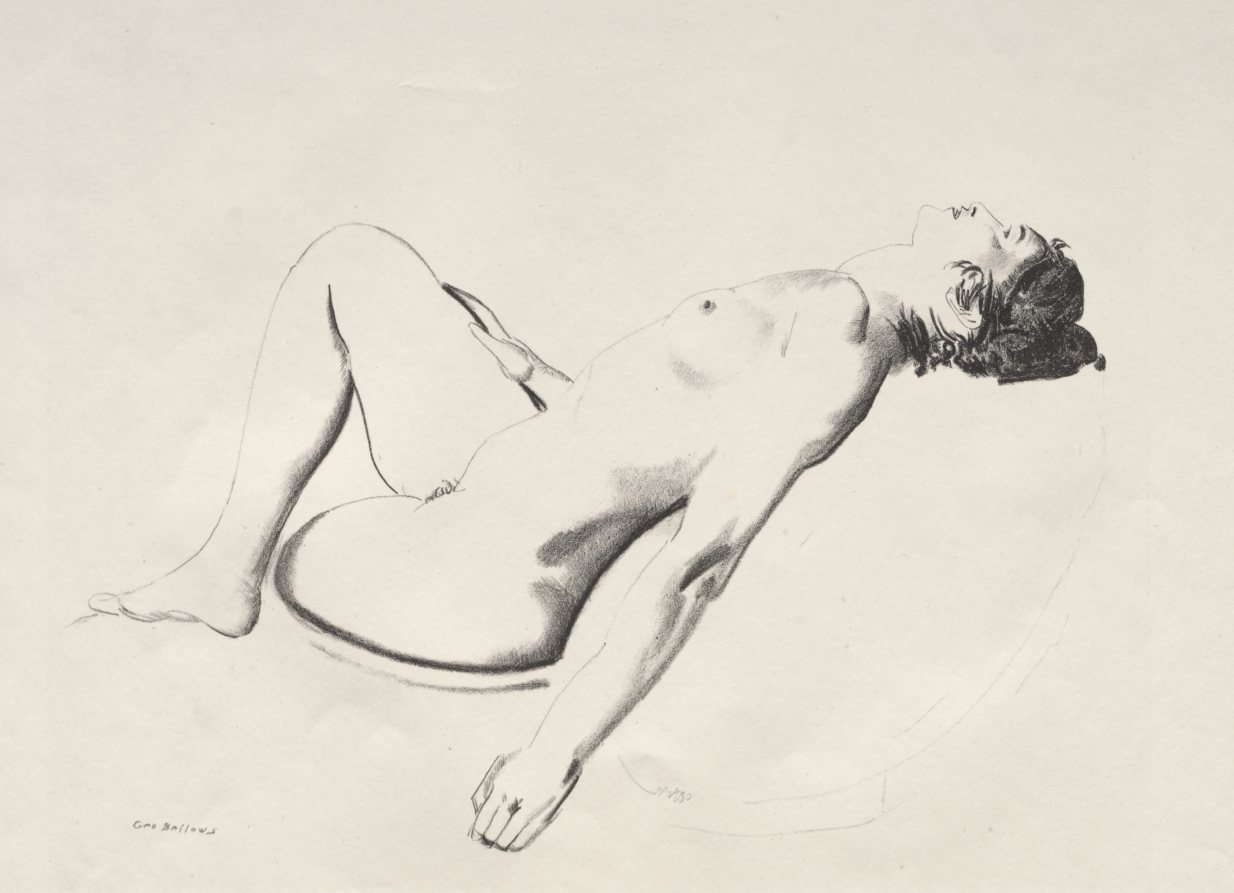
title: Nude Study, Woman Lying on a Pillow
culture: America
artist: George Bellows (American, 1882–1925)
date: 1924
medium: lithograph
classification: Print